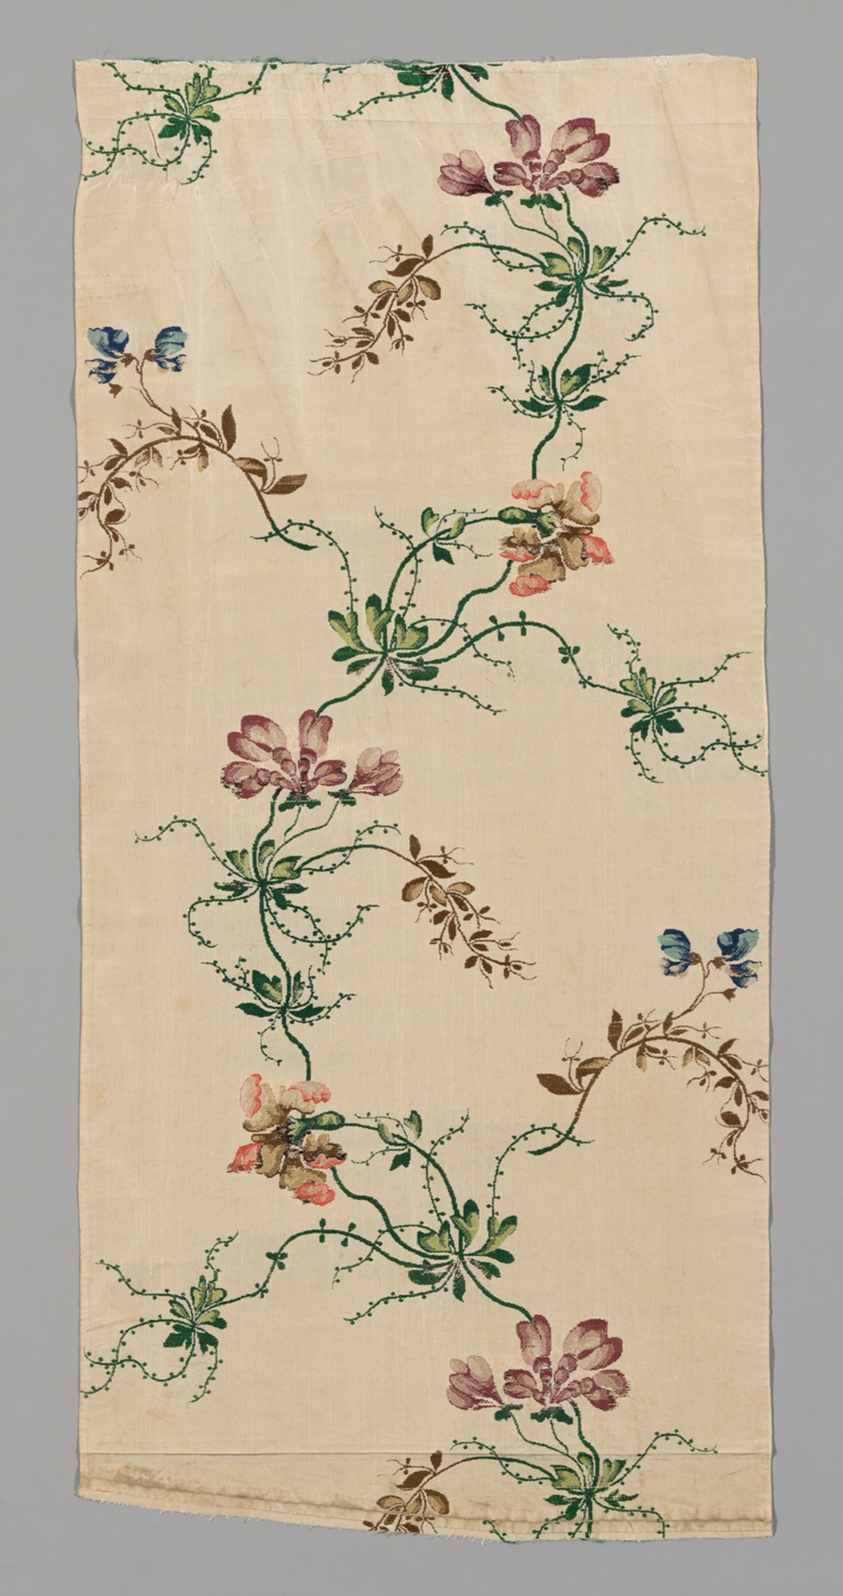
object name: Costume and Accessories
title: Panel from a Skirt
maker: Possibly designed by Anna Maria Garthwaite; English, 1720–1756; England, Spitalfields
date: 1741/42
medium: Silk, plain weave with weft-float faced 2:1 twill interlacings of secondary binding warps and brocading wefts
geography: England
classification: textile; weaving; costume